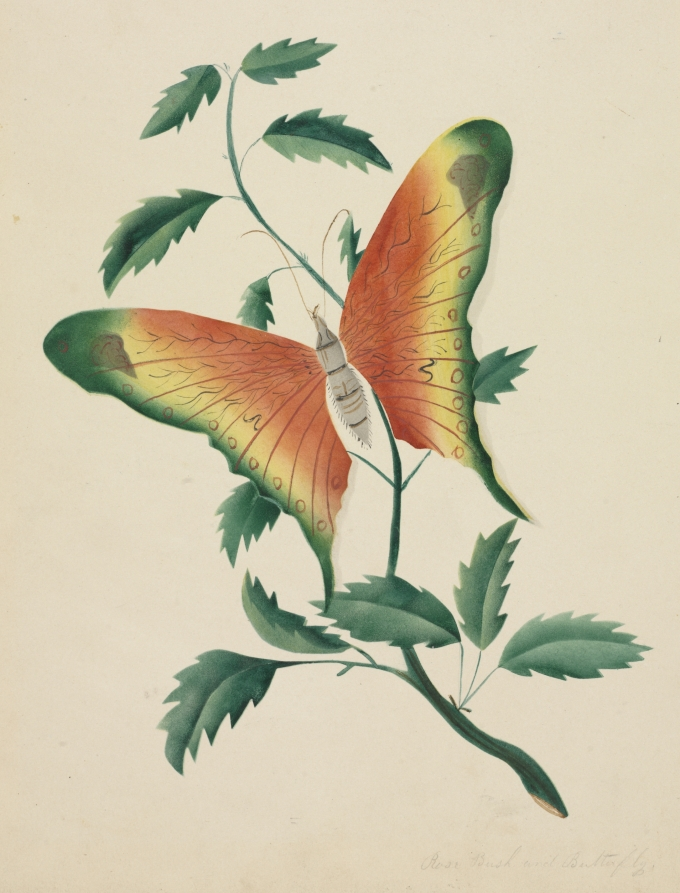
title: Rose Bush and Butterfly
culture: America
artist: Mary Altha Nims (American, 1817–1907)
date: 1800s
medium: watercolor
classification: Drawing